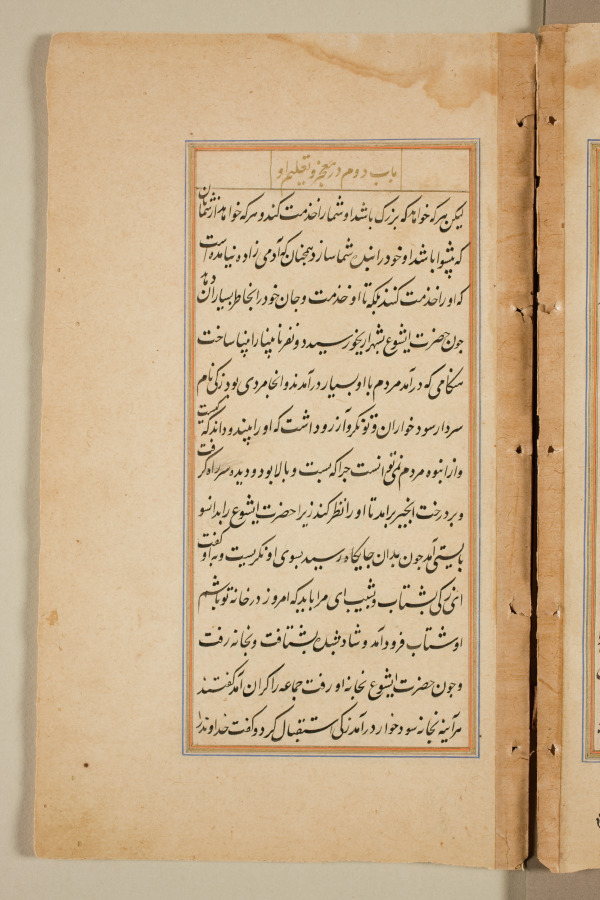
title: Text page from a Mirror of Holiness (Mir’at al-quds) of Father Jerome Xavier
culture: Mughal India, Allahabad, made for Prince Salim (1569–1627)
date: 1602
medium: Ink and gold on paper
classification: Manuscript